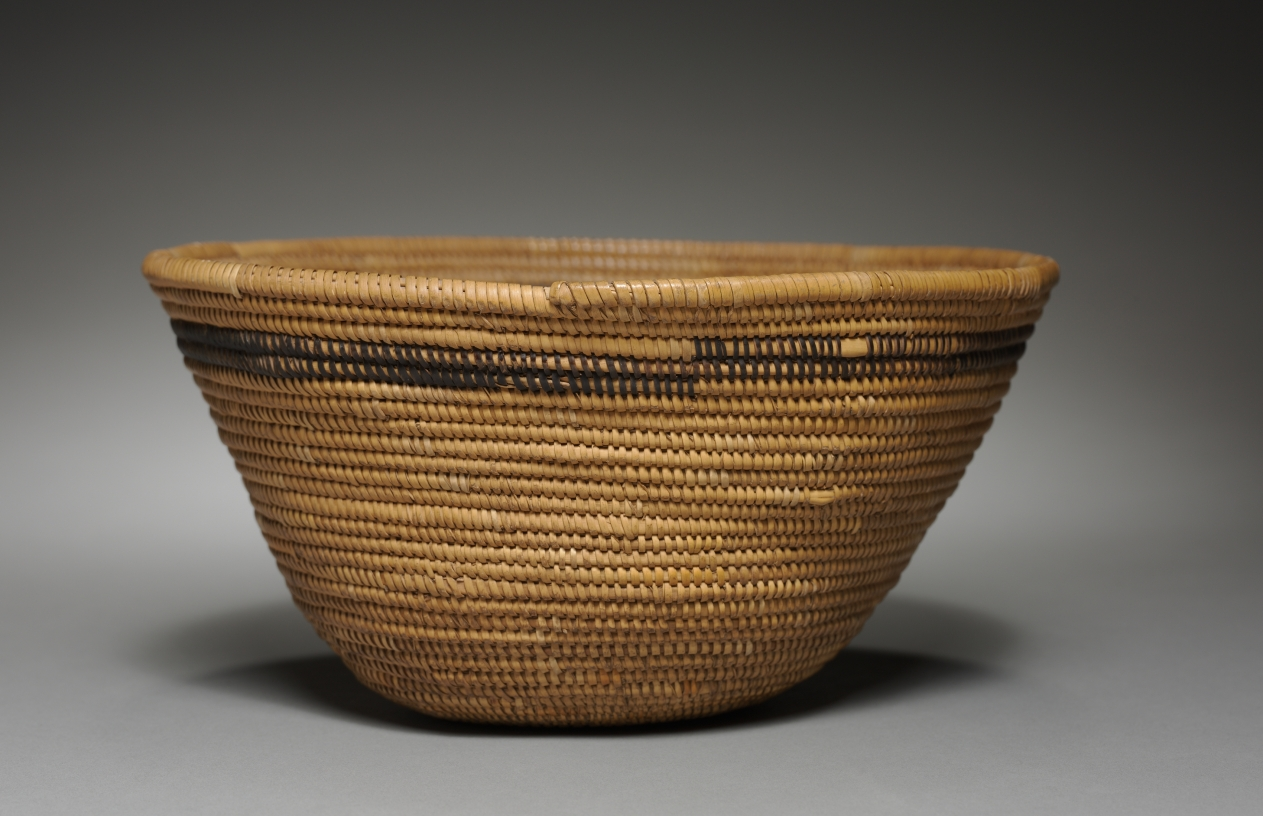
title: Hat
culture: California, Southern, Late 19th- Early 20th century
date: c 1875– 1925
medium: Juncus, Sumac; Coiled; Deergrass foundation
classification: Basketry